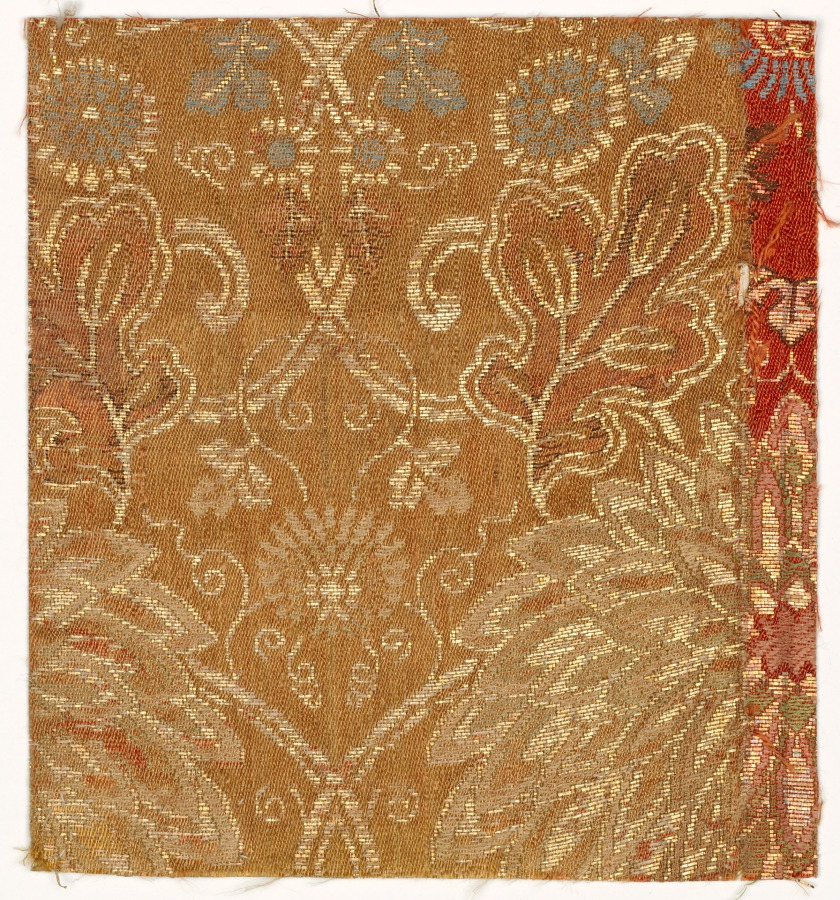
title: Textile Fragment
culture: Japan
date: 1800s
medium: silk, metallic thread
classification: Textile